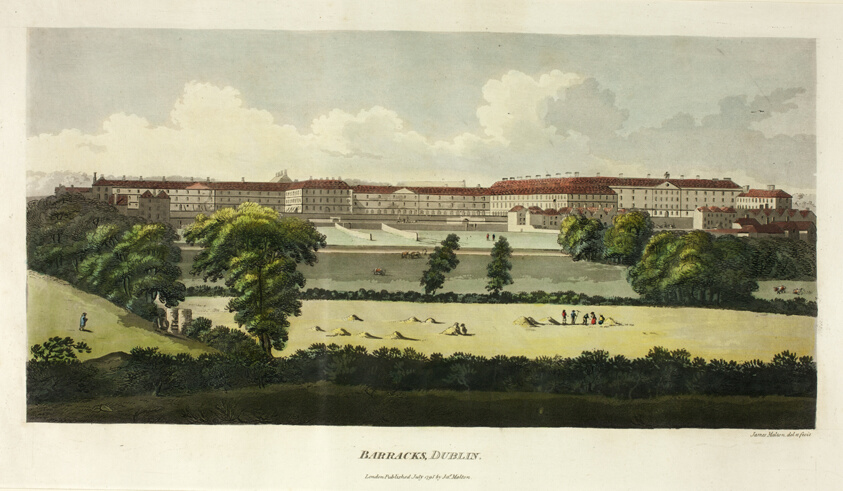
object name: Print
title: Barracks, Dublin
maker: James Malton (English, 1761-1803)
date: published July 1795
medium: Hand-colored aquatint in black on ivory wove paper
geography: England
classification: aquatint; print; prints and drawing